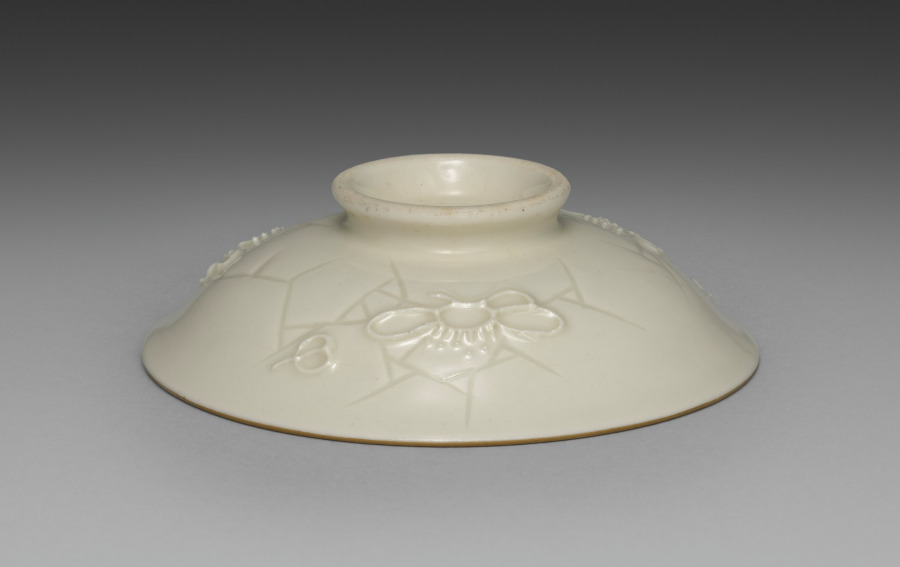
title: Cover for a Bowl from Dining Set with Plum Blossoms and Cracked-Ice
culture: Japan, Meiji period (1868–1912)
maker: Seifū Yohei II (Japanese, 1844–1878)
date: c. 1875–78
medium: Porcelain with molded designs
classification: Ceramic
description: Each item in this set has a delicate low-relief design of flowering plum branches over scattered, intersecting lines meant to resemble the cracked-ice surface of a frozen body of water and is signed on the base in gold pigment. While Yohei II produced many fine works in underglaze blue, like those produced by Kiyomizu Shichibei, he also made works in quite different styles later in his career, from the early 1870 s. In 1873, he was appointed purveyor to the Industrial Center of Kyoto Prefecture, a designation associated with Kyoto’s efforts to reach an international market through the port of Kobe; and from 1875 until his death, he was involved in national-level projects to present Japanese ceramics across the world. It was during this period that Yohei III was apprenticed to Yohei II, and it has been suggested that this set may in fact be an early example of Yohei III’s work, which he signed with his teacher’s name. Decorated with flowers resembling Japanese textile motifs, the set calls to mind the design of Yohei II’s pair of vases with plum blossoms in the Victoria and Albert Museum. Here, the elaborate trees created for a formal public exhibition setting have been translated into the approachable blossoms of the genteel domestic environment. While the designs are consistent across the pieces, each raised flower petal and pistil and each incised line in the ice was done by hand, so the cups, bowls, and dishes are similar yet unique. The bottoms of two boxes once identified the set’s owner, but the information has been deliberately obscured with black ink. However, inscriptions still visible appear to indicate two occasions, once at the end of July 1886 , and once again in June 1916 , when parts of the set were requested from Hokura in Niigata Prefecture. The location corresponds to a neighborhood in the present-day city of Jōetsu. The surname Tsuji 辻 also appears on a paper tag affixed to one of the box cloths. Future research may possibly reveal more about their provenance. A vase by Yohei III in a private collection combines the formal grandeur of the Yohei II vases in the Victoria and Albert Museum with the gentler design of this dining set, placing flowering plum trees against soft, scalloped-edge clouds resembling those in golden screens.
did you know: The dining wares have a creamy white coloration that the four boxes containing them identify as Korean in style.